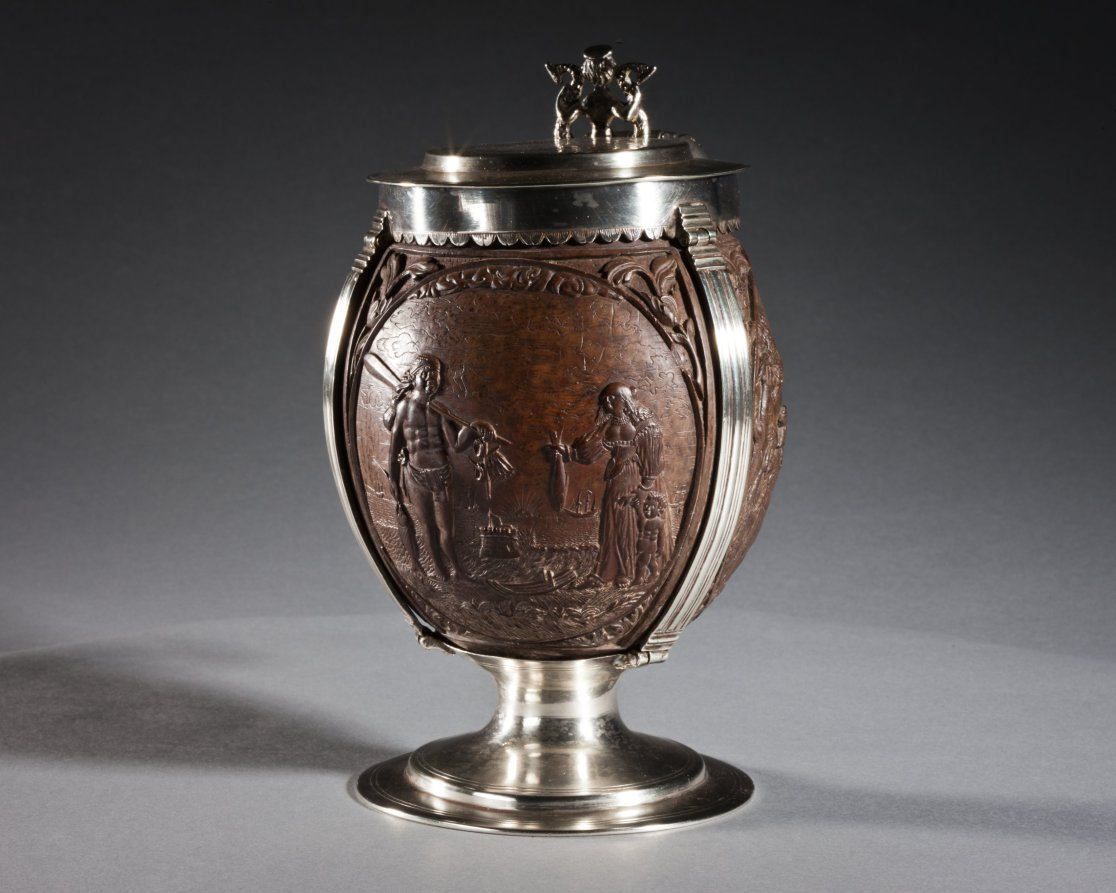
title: Coconut Cup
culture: carved coconut, probably The Netherlands; silver mount, probably England, 17th century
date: c. 1630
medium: carved coconut in silver mount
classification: Metalwork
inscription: top lid has engraved coat-of-arms, underside of lid has inscription: George Lewis TIVERTON Feby, 1st 1760.